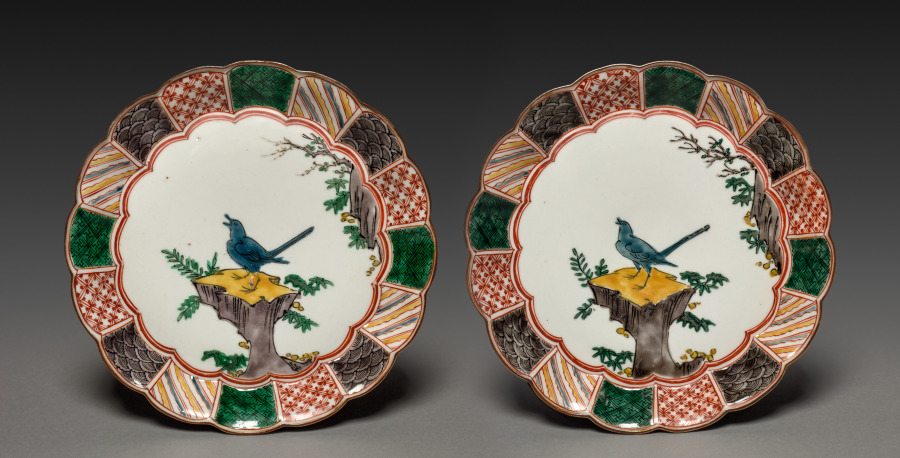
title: Pair of Dishes with Singing Bird on a Rock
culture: Japan, Edo period (1615–1868)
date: 1700s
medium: porcelain with underglaze blue and overglaze enamel decoration (Hizen ware, Ko-Kutani type)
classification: Ceramic